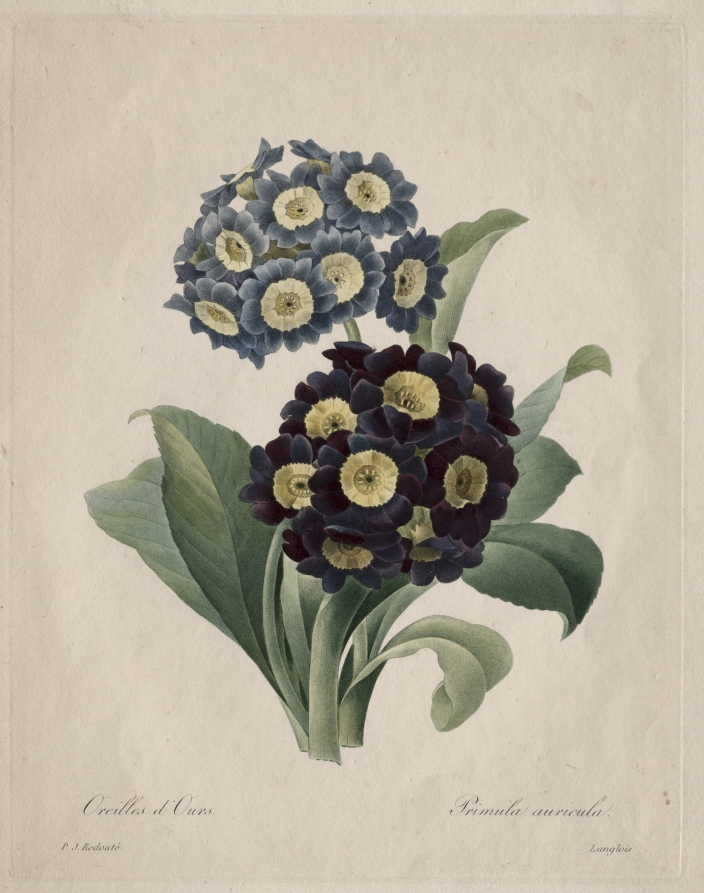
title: Primula auricula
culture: France, 19th century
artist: Henri Joseph Redouté (French, 1766–1853)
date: 1827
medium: stipple and roulette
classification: Print